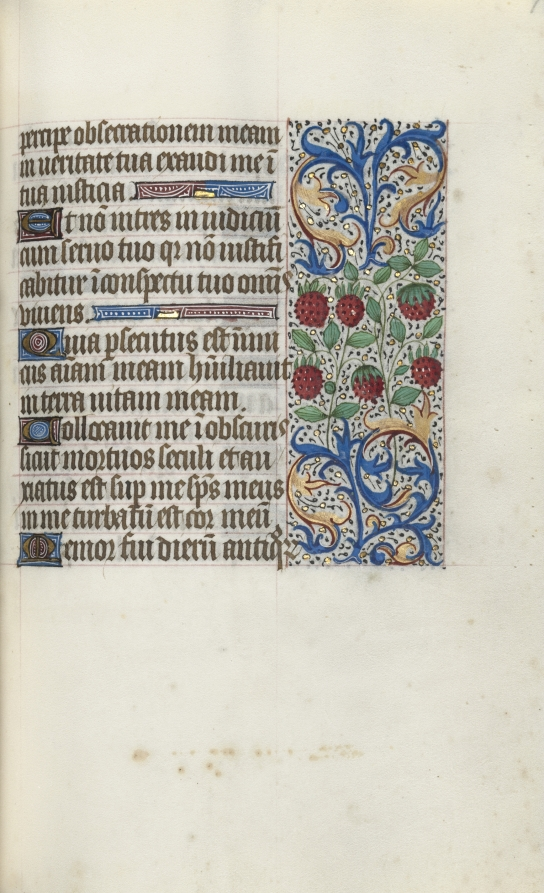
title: Book of Hours (Use of Rouen)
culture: France, Rouen, 15th century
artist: Master of the Geneva Latini (French, active Rouen, 1460–80)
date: c. 1470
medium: ink, tempera, and gold on vellum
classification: Bound Volume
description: In the late 1400s and early 1500s Rouen was an established and important center of book production. The city’s cathedral had a wealthy chapter that spent large sums of money to commission books and to maintain its extensive library. The stationers and booksellers would have likely been concentrated in or near the cathedral precinct. This artist, named after a manuscript now in Geneva, was Rouen’s principal illuminator during the second half of the 1400s.